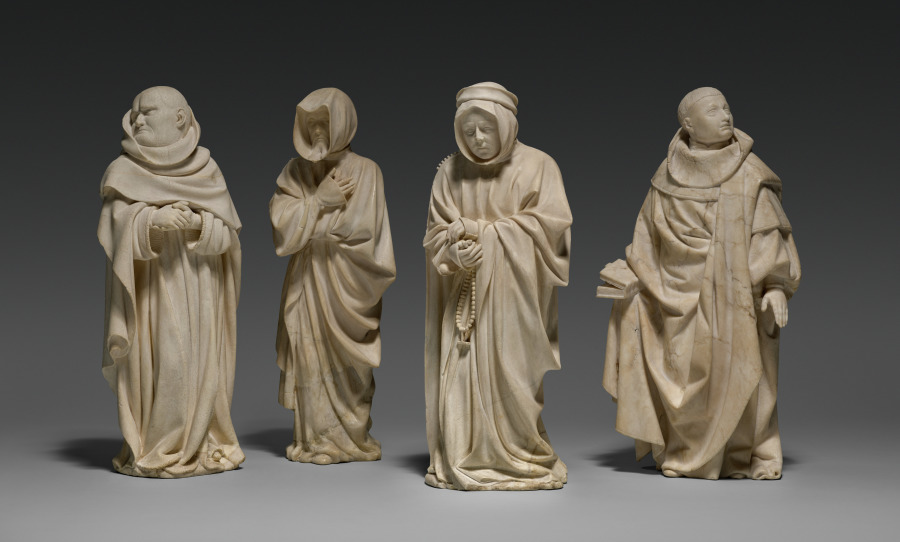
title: Mourner from the Tomb of Philip the Bold, Duke of Burgundy (1364–1404)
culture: Netherlands, active Dijon, 15th century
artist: Claus de Werve (Netherlandish, 1380–1439)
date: 1404–10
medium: vizille alabaster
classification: Sculpture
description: This figure comes from the tomb of Duke Philip the Bold from the church of Champmol near Dijon (Burgundy, France). Philip, who founded the monastery and designated it as his burial place, hired the best artists, many of whom came from the Netherlands. While the commission was given in 1381, the work was not completed until 1410, six years after the duke’s death. This mourner is unusual for the time because it is not carved as a static low relief on the pedestal of the tomb but interact with the viewers and their fellow procession members. The lifelike quality of the figure is due in large part to the alabaster. Its softness allowed artists to carve details into the material, and the transparent, milky white stone could also be polished to a high gloss.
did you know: The use of alabaster in the late Middle Ages began in the 1300s with court art in the circles of French kings, especially in the field of funerary sculpture.